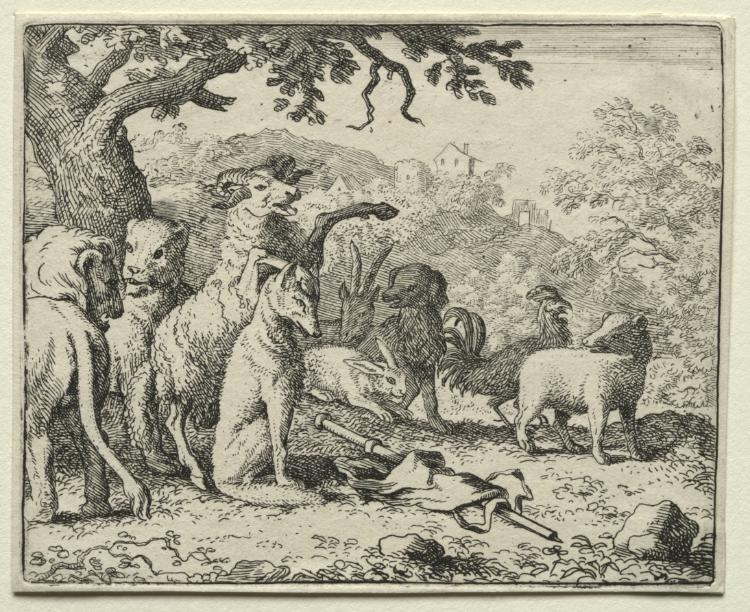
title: Reynard the Fox: The Benediction Given to Reynard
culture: Netherlands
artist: Allart van Everdingen (Dutch, 1621–1675)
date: 1650–75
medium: etching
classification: Print